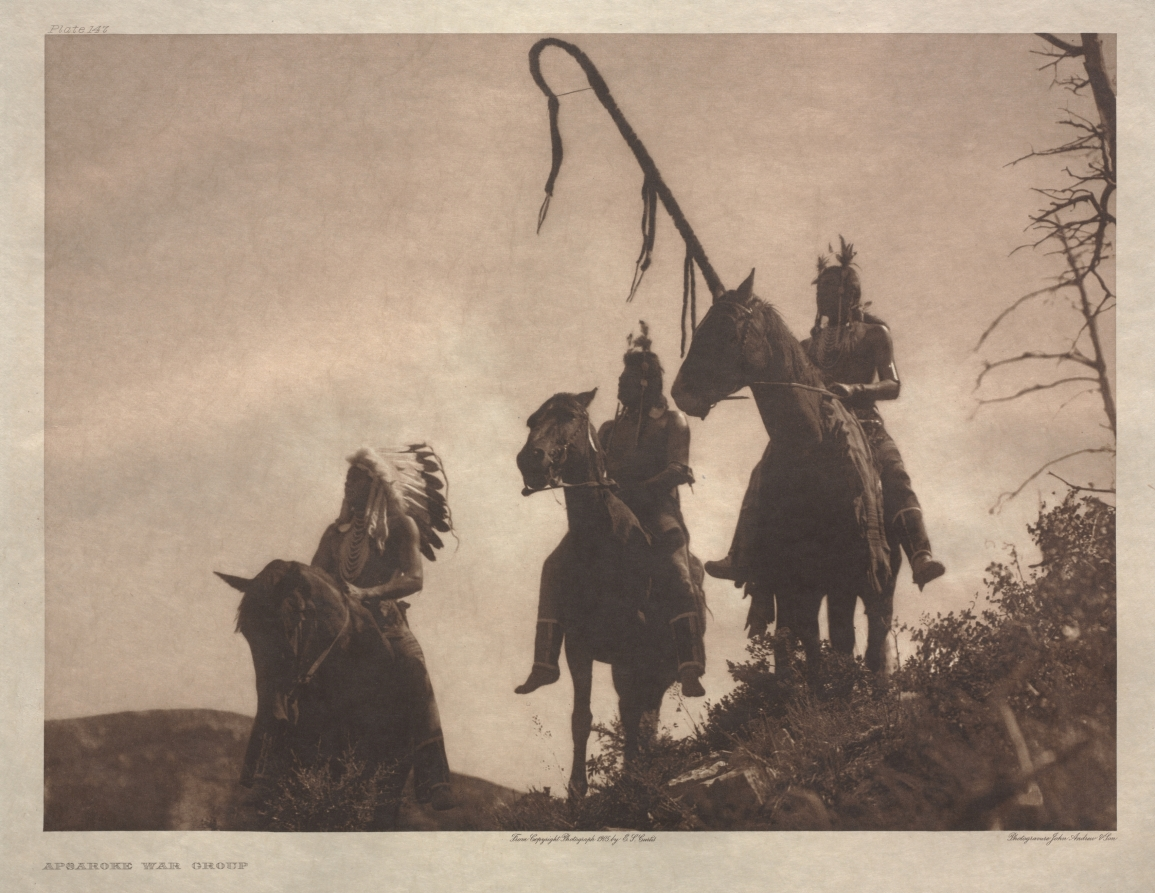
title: Portfolio IV, Plate 147: Apsaroke War Group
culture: America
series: The North American Indian: being a series of Portfolios picturing and describing the Indians of the United States, the Dominion of Canada, and Alaska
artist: Edward S. Curtis (American, 1868–1952)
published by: The University Press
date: 1905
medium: photogravure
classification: Portfolio